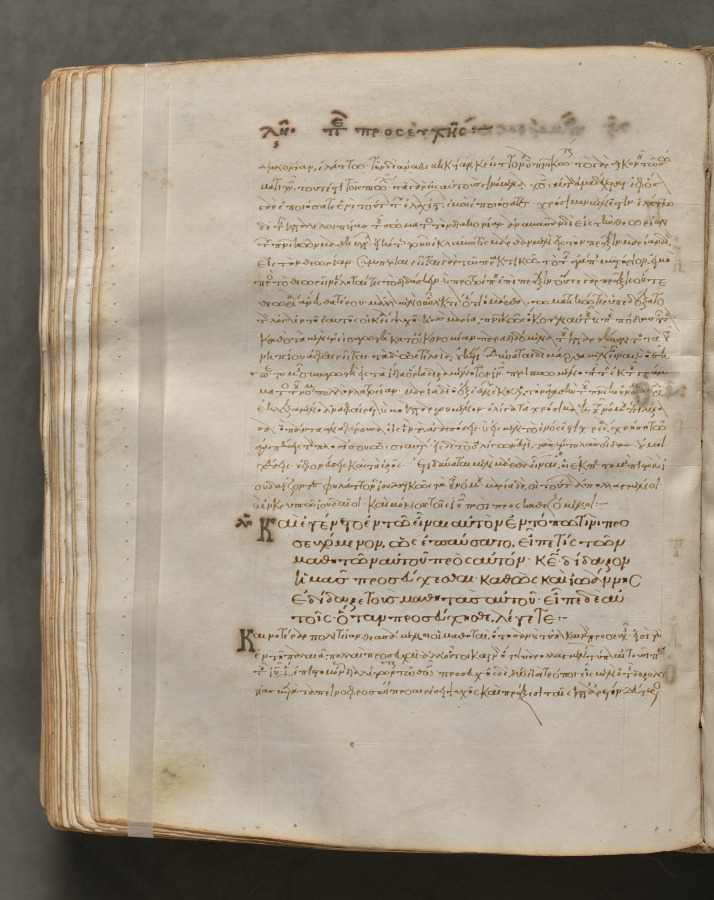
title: Text, folio 257 (verso), from a Gospel Book with Commentaries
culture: Byzantium, Constantinople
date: c. 1000–1100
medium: ink, tempera, and gold on vellum; leather binding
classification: Bound Volume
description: Each of the four gospels in this book opens on a page with brilliantly illuminated borders depicting the author of the text as well as birds—principally peacocks, symbols of the immortality of the soul—and fountains, representing the fountain of life and the salvation of the soul. This volume consists of 428 leaves with texts in Greek. Its level of sophistication suggests that it was probably written and decorated in a monastery in Constantinople.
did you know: Gospel books were carried in procession through Byzantine churches.